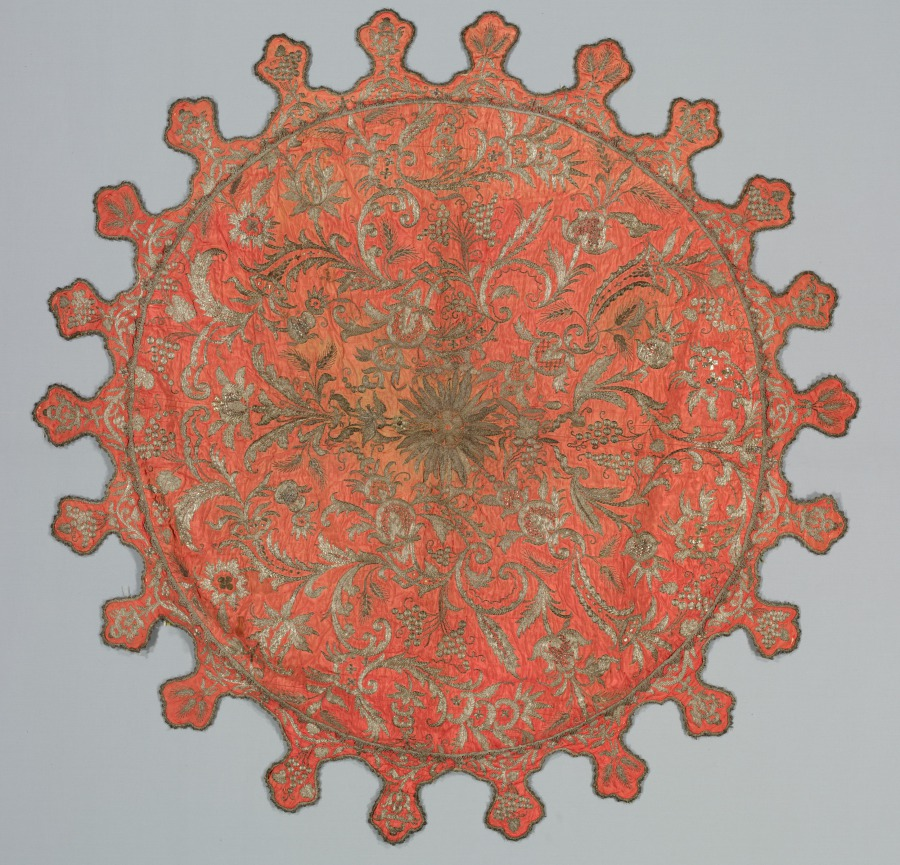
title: Parasol Top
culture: France, 18th century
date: 1700s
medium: embroidery; silver metallic thread and silk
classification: Embroidery